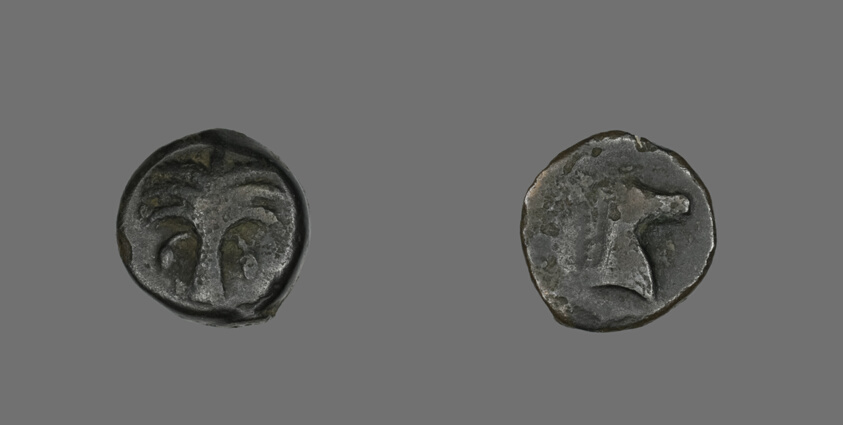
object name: Coin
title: Coin Depicting a Date Palm Tree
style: greek, ancient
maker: Greek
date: 410-146 BCE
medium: Bronze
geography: Carthage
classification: coin; ancient art; struck